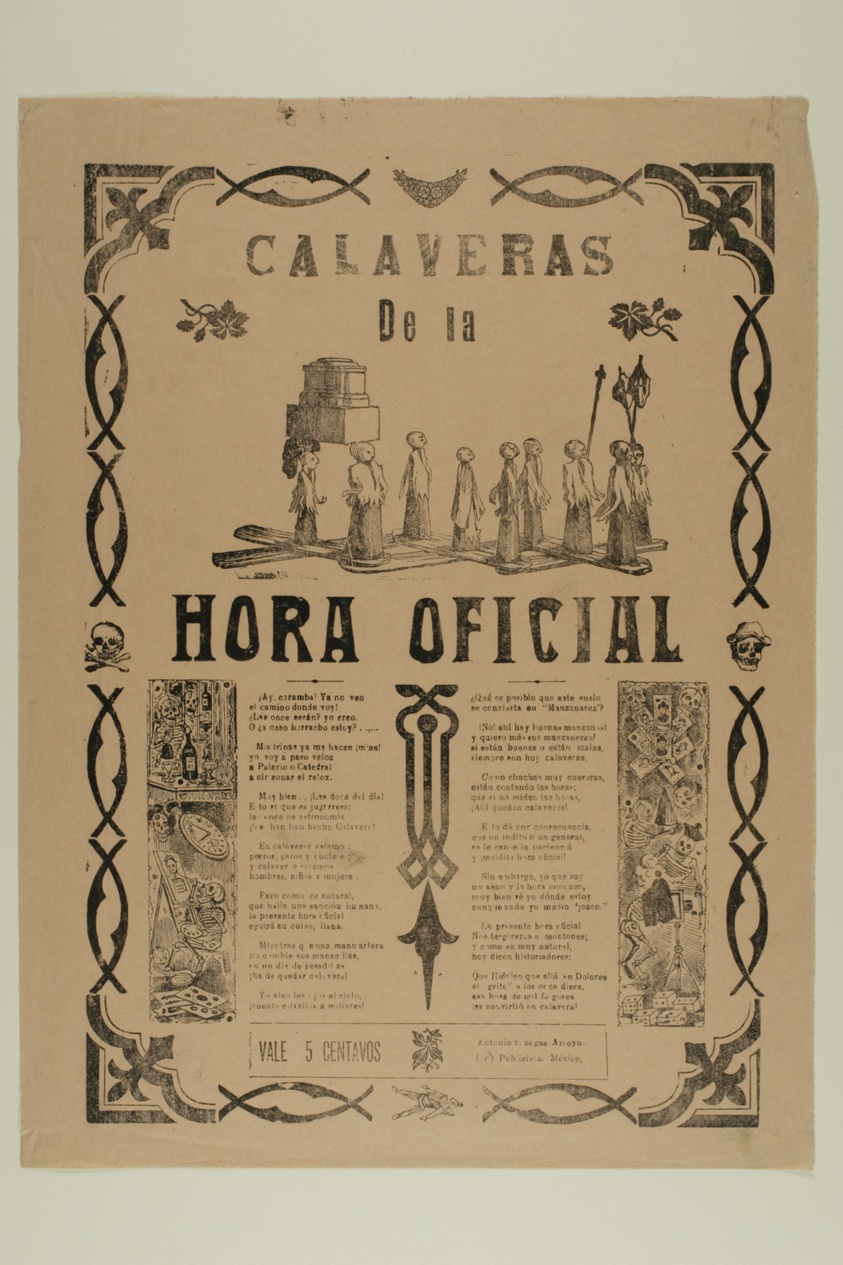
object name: Print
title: Calavera de la hora oficial (Calavera of the Official Time)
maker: José Guadalupe Posada (Mexican, 1852-1913)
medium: Relief print on paper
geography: Mexico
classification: relief etching; print; prints and drawing